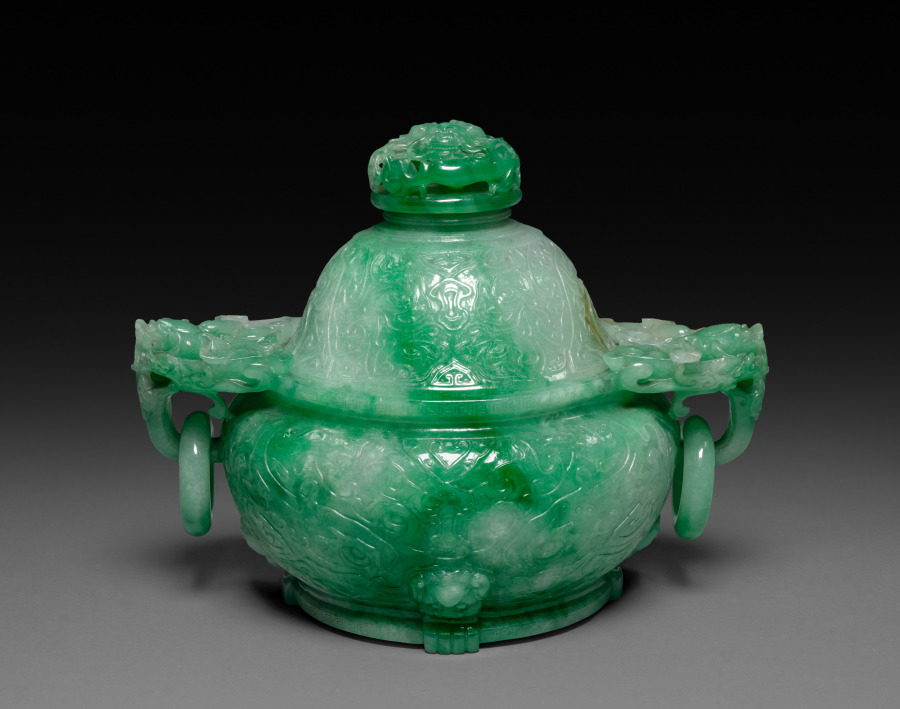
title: Incense Burner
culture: China, Qing dynasty (1644–1911), Qianlong reign (1736–95)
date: 1736–95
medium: jade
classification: Jade